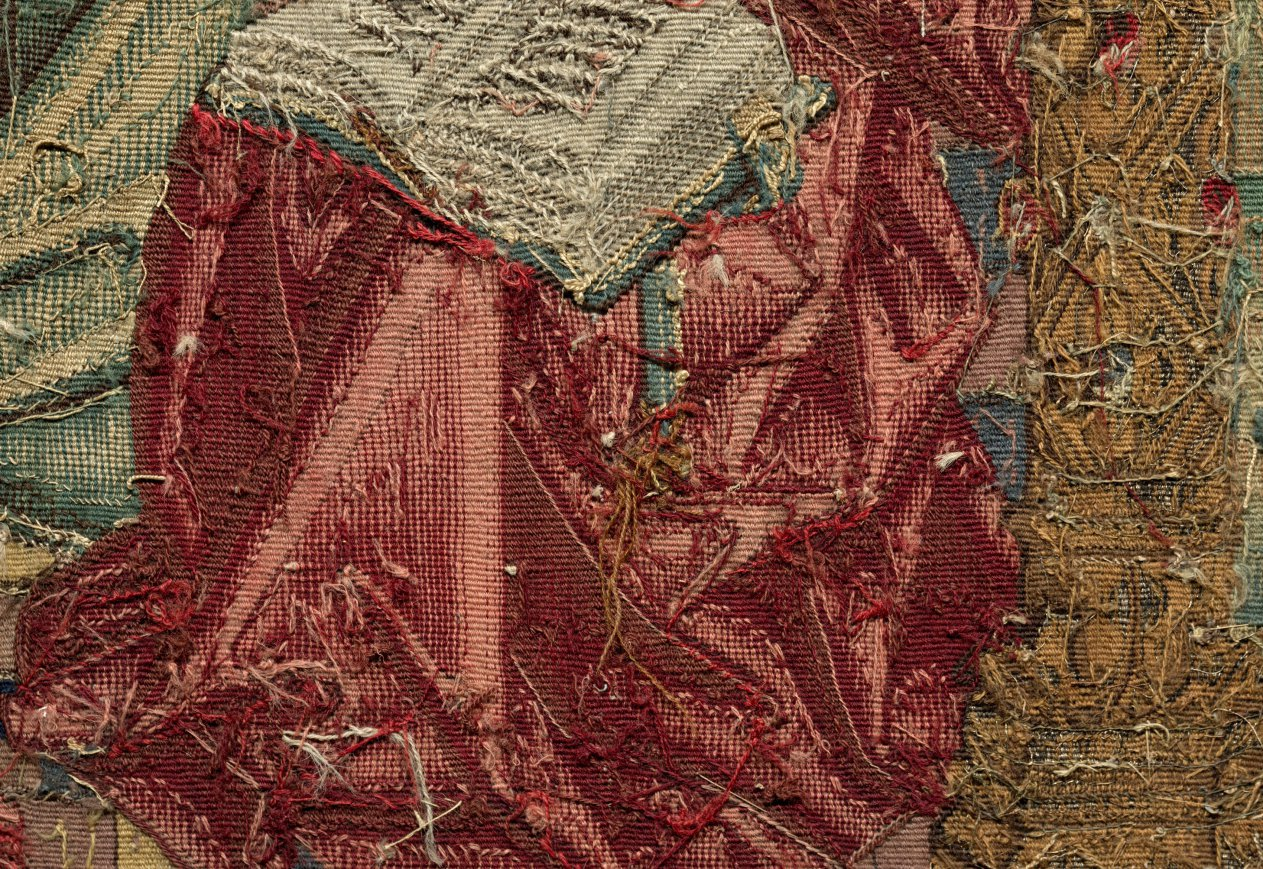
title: Altar Frontal: Scenes from the Childhood of Christ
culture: France and South Netherlands, 1500s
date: c. 1500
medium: Wool, silk, gold thread; tapestry weave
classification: Tapestry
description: Pictorial tapestries were symbols of wealth and more highly prized than paintings. Small tapestries with Christian imagery were frequently commissioned to embellish the fronts of altars. This example displays the Massacre of the Innocents, the Flight into Egypt, and Christ among the Doctors. Tapestry weave is ideal for creating narrative scenes. The technique can be compared to painting, as each colored weft (horizontal thread) is interlaced with warps (vertical thread) where needed for the pattern. As expensive investments, tapestries have the advantage of being portable and easily stored and displayed.